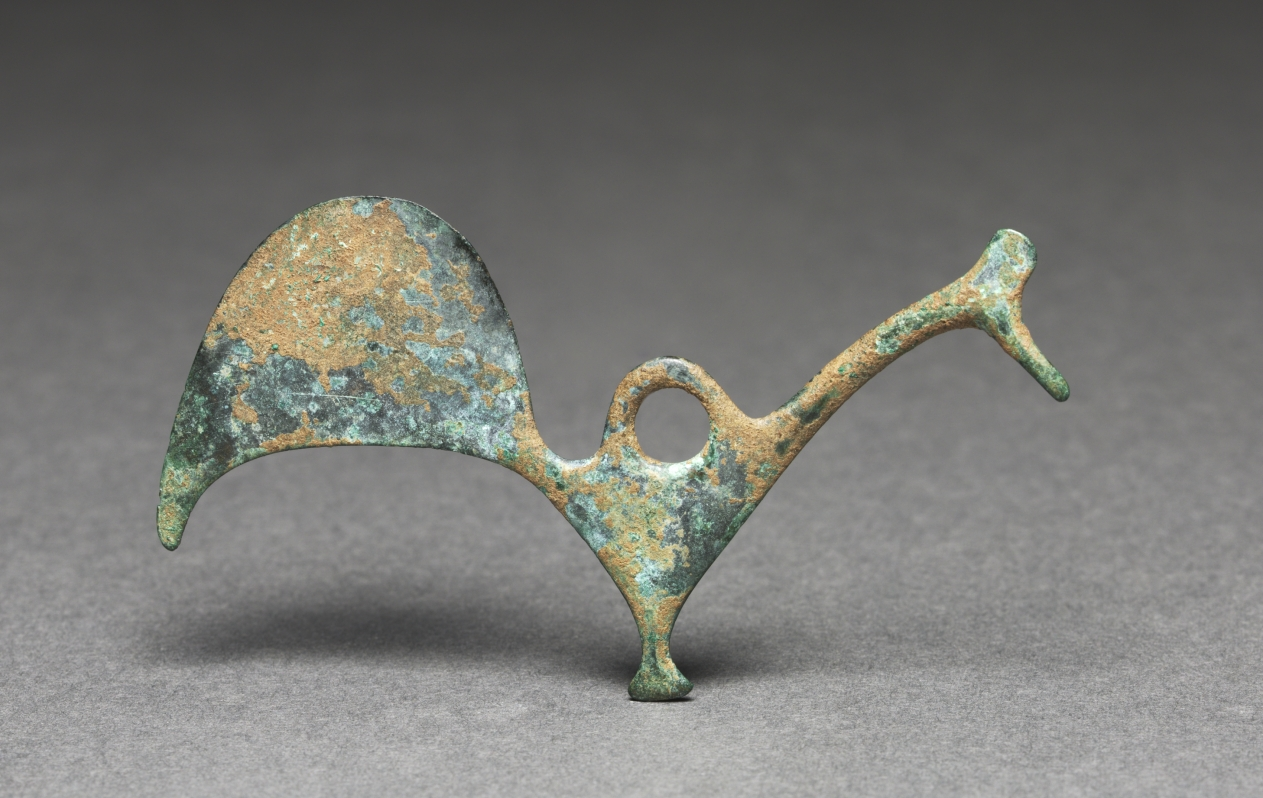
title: Pendant of a Bird (Rooster?)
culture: Northern Greece, Macedonian, Geometric period (900-700 BCE)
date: 700s–600s BCE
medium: bronze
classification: Jewelry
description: Although quite schematic, the subject of this pendant is easily recognizable as a bird, likely a rooster. Cleverly designed to hang evenly from its central suspension loop, it comprises three main parts: long neck terminating in a head with a pointy beak and small crest; triangular body with stylized feet; and broadly arched tail feathers.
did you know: The green patina of this bronze bird pendant is a result of oxidation.